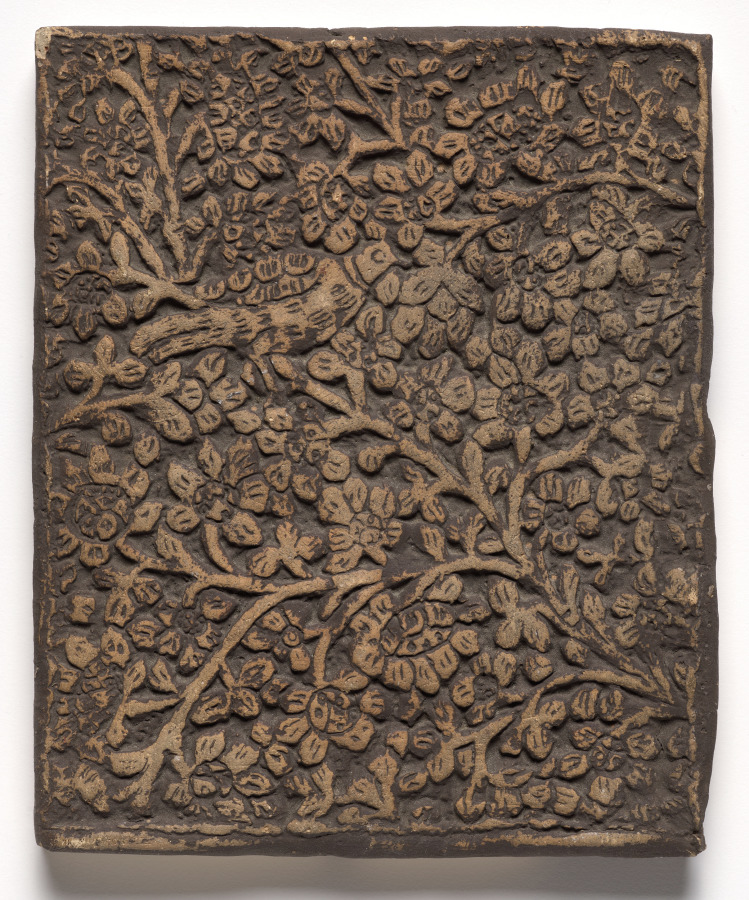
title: Tile- Bird Amid Foliage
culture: America, Pennsylvania, Doylestown, Early 20th century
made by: Moravian Pottery and Tile Works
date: before 1921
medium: unglazed ceramic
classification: Ceramic